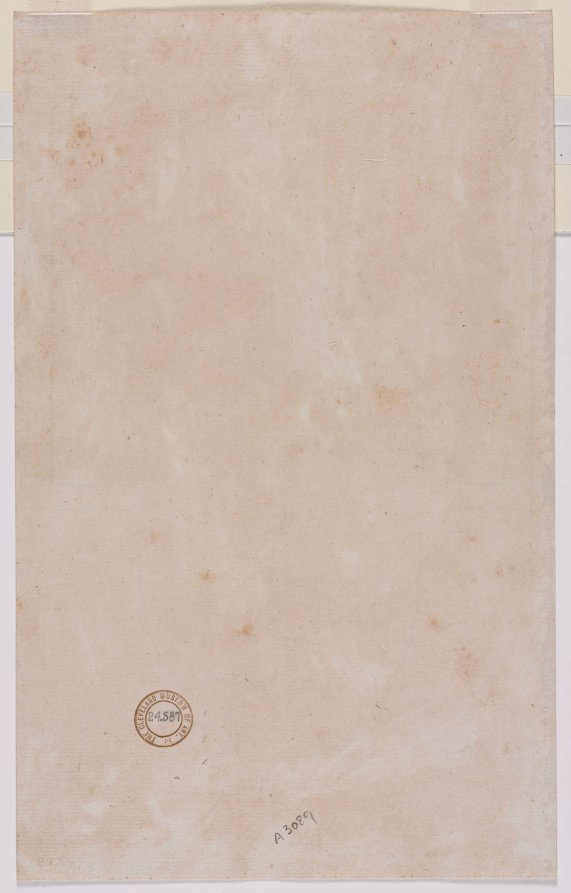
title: Architectural Plan (verso)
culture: Italy, 16th century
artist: Luzio Romano (Italian, active 1528–75)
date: mid 1500s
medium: pen and ink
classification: Drawing